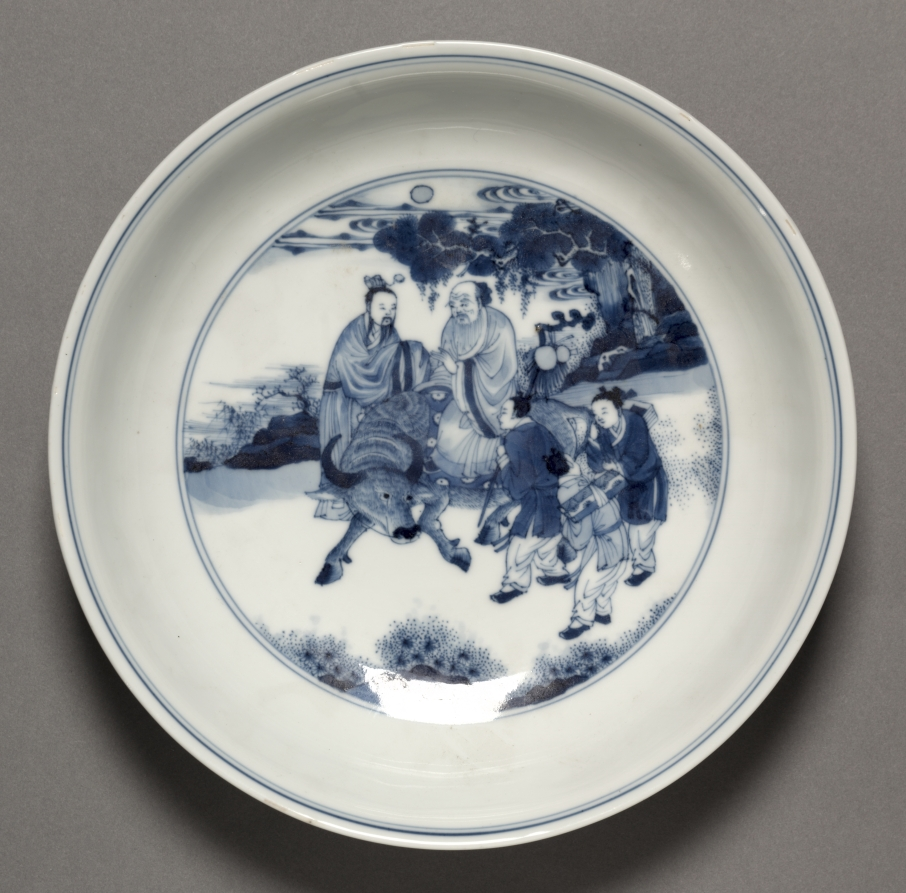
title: Dish with Laozi Riding a Water Buffalo (interior); Pavilion and Immortals in Rocky Landscape (exterior)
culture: China, Jiangxi province, Jingdezhen kilns, Qing dynasty (1644-1911), Yongzheng reign (1723-35)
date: 1723–35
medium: porcelain with underglaze blue decoration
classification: Ceramic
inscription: 大明成化年製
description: Daoism traces its origins to Laozi, a sage believed to have lived in the sixth century BC, who was the reputed author of the Daode jing (Classic of the Way), a fundamental text for Daoism. The interior of this dish depicts the elderly Laozi riding a buffalo. He is accompanied by three servants and is greeted by a scholarlike figure. This dish borrows brush and shading techniques typically employed by artists who paint on paper or silk, a development frequently seen in porcelain decoration around the 1700s.